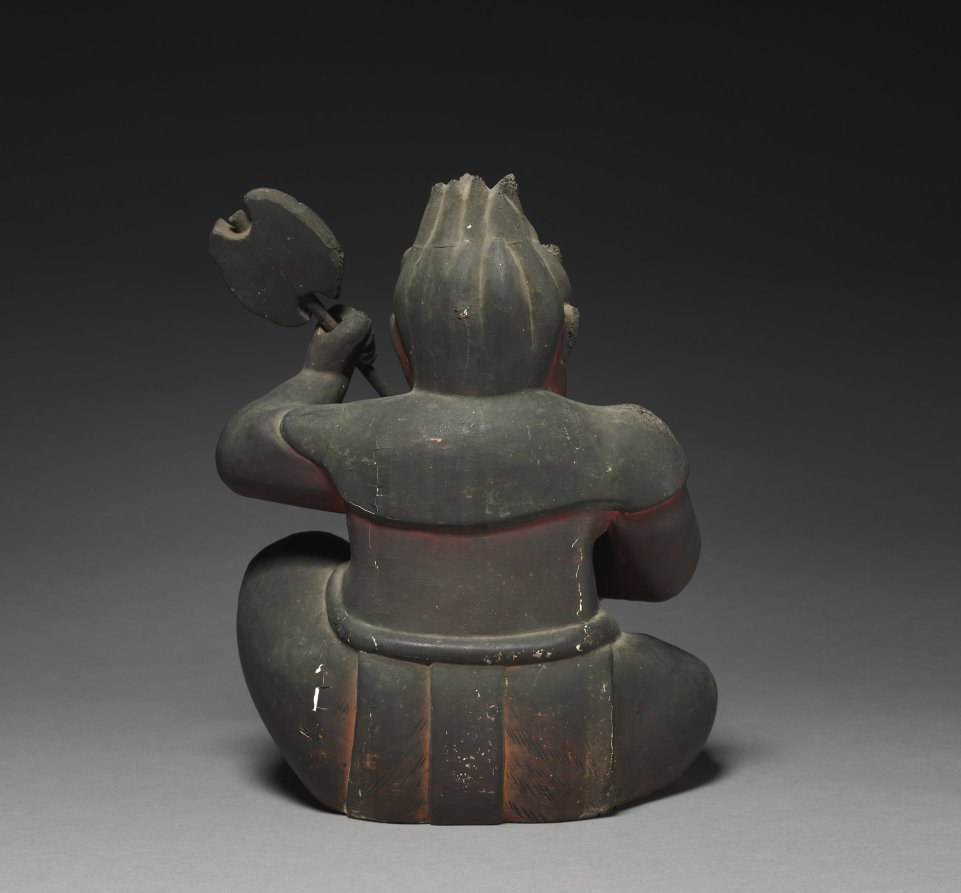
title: Seated Zenki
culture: Japan, Muromachi period (1392–1573)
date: 1400s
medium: wood with pigment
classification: Sculpture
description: The axe-wielding red Zenki, and the vase-holding, bamboo backpack-wearing green Koki are both under the mystical control of the monk, En no Ozunu (legendarily 634–701), also known as En no Gyōja, or “En the Ascetic,” considered to have founded Shugendō, a style of religious practice focused on performing austerities in mountainous settings.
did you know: A popular Japanese comic named Zenki was inspired by the figure seen here wielding a weapon.